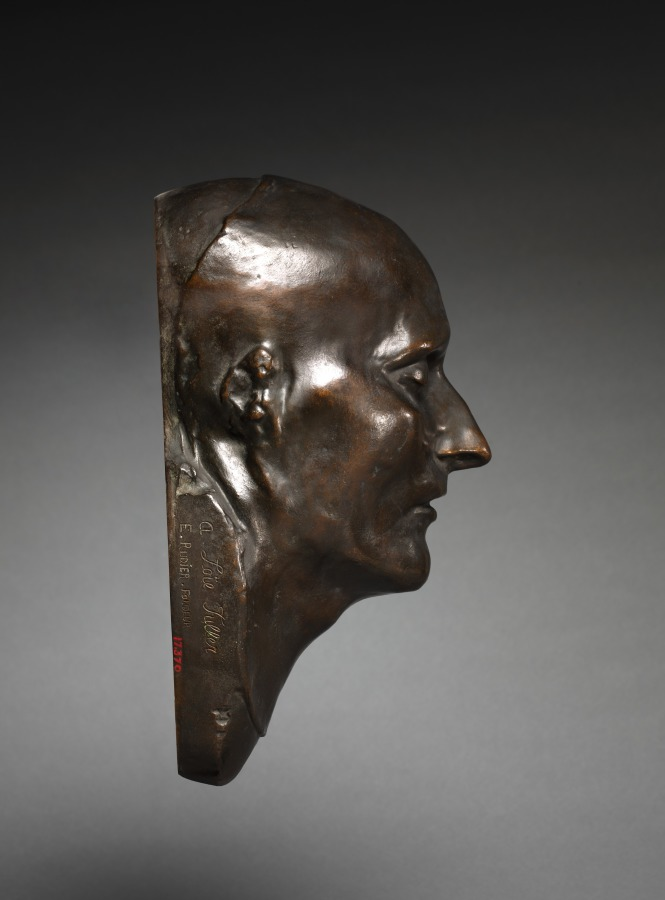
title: Mask of Napoleon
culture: Italy, 19th century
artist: C. Francesco Antommarchi (Italian, 1780–1838)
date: early 19th century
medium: bronze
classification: Sculpture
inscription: Signed on one side, inscribed on the other: "A Loie Fuller. E. Rudier, fondeur"